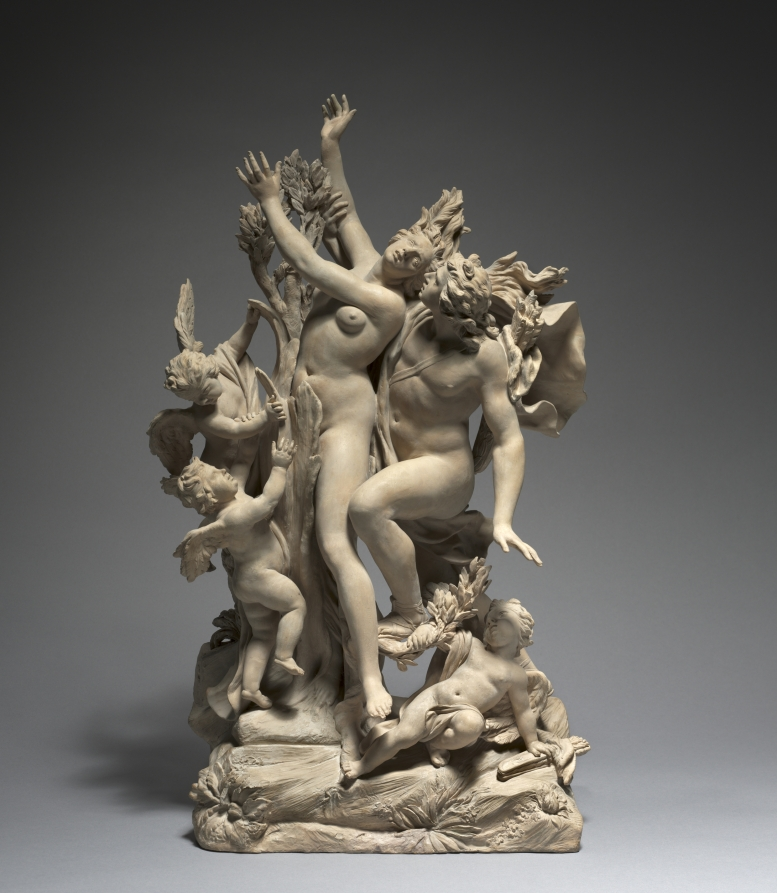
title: Apollo and Daphne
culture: Italy, Florence, 17th century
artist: Massimiliano Soldani (Italian, 1656–1740)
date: c. 1700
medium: terracotta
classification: Sculpture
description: Apollo, the Greek and Roman god of the sun and the arts, fell in love with the nymph Daphne. Chased to a riverbank, Daphne prayed to her father, the river god, Peneus, for help. At the moment Apollo reached out to touch her, she transformed into a laurel tree, branches and roots sprouting from her body. This work reveals key preoccupations of artists working in Italy in the 1600s: novel, active compositions; fleeting moments; and transformation from one physical form into another. Soldani based this work on a large-scale marble sculpture from 1622–25 by the Roman artist Gian Lorenzo Bernini.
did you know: Soldani shows Daphne in the process of turning into a tree to escape the persistent Apollo.